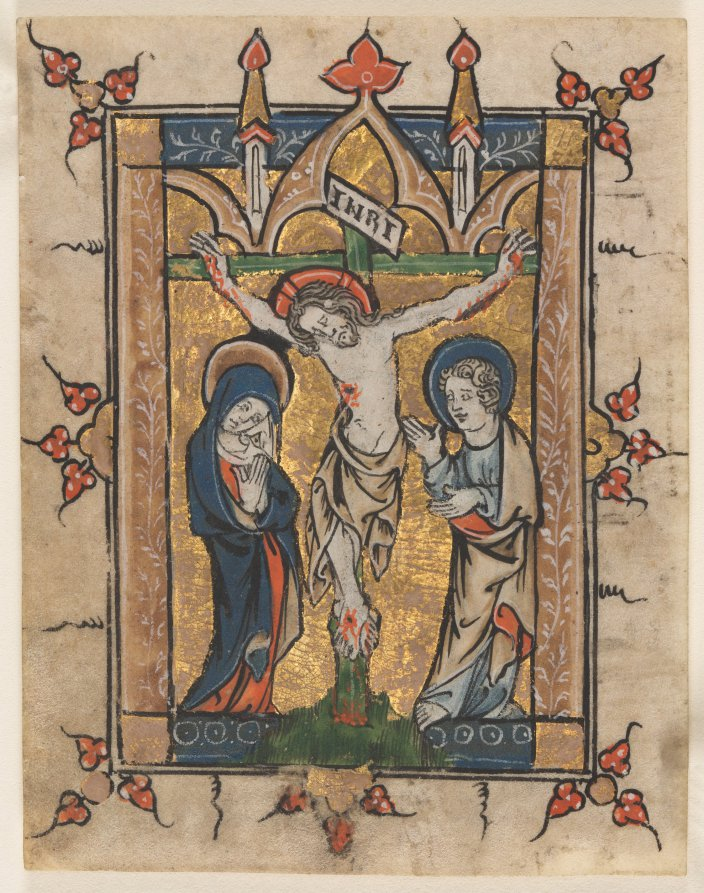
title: Leaf from a Psalter: The Crucifixion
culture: Flanders, Liège, 14th century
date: c. 1300–1330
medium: ink, tempera and gold on vellum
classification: Manuscript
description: The diocese of Liège was extremely active as a production center for psalters and psalter-hours from the second half of the 1200s through about 1330. This market, no doubt, was stimulated by the need of women for a devotional text. As women were drawn to the convents of religious orders such as the Dominicans, the Beguines and Begards, and the Poor Clares, they had need of a book that would provide them with suitable devotional material. The psalter was the book that these women, many of whom were high-born, most commonly used. The present leaf, with its monumental miniature of the Crucifixion, and like many surviving 13th-century psalters, may have thus provided visual focus for the prayers of a woman in a convent setting. Customarily, the level of quality and the extent to which these books were decorated depended upon the means of the patron.